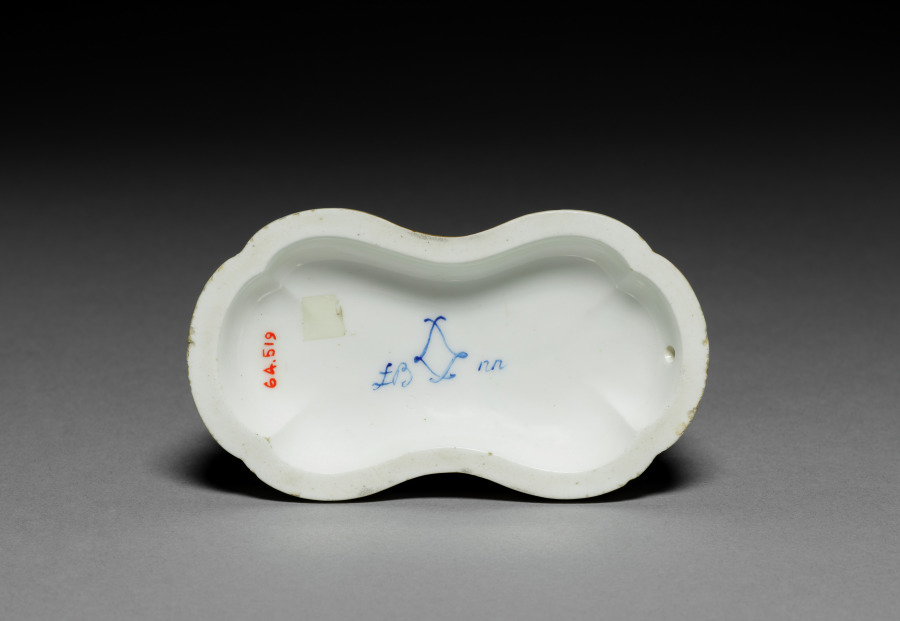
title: Double Salt Dish (Salière)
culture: France, Sèvres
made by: Sèvres Porcelain Factory (French, est. 1756)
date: 1790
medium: Hard-paste porcelain with enamel and gilt decoration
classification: Ceramic